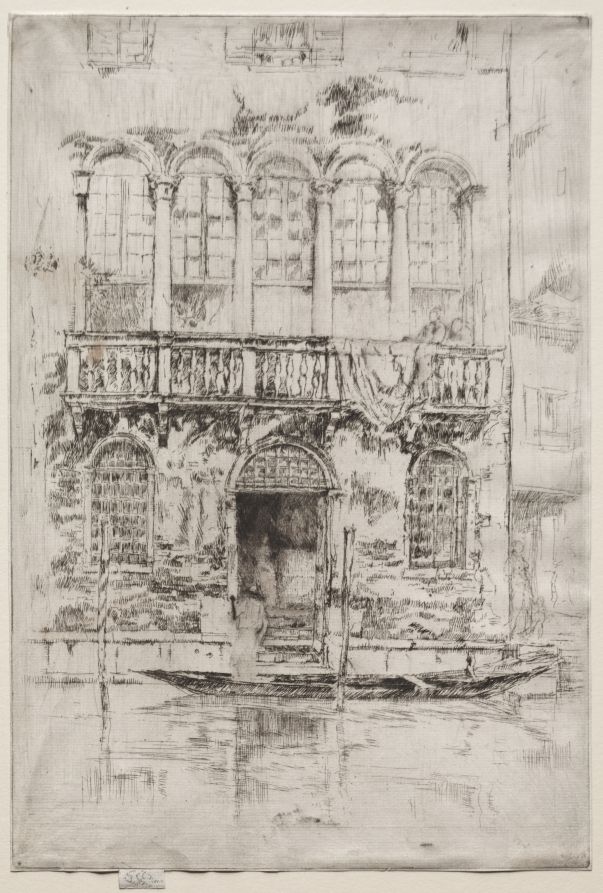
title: The Balcony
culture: America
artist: James McNeill Whistler (American, 1834–1903)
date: 1886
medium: etching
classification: Print